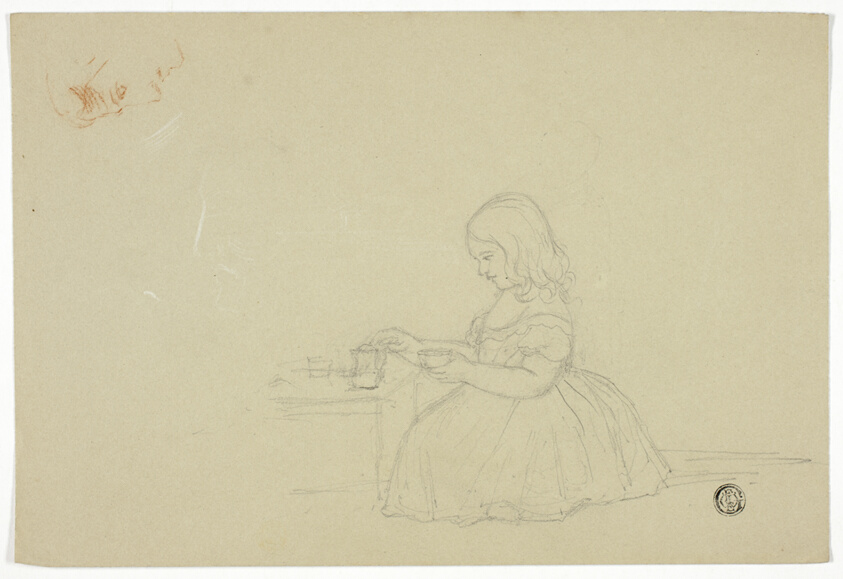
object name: Drawing and Watercolor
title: Young Girl Pouring Tea and Profile Sketch (recto), and Sketch of Italian City Street (verso)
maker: Elizabeth Murray (English, c. 1815-1882)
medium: Graphite and red chalk with traces of white chalk (recto), and graphite (verso), on gray wove paper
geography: England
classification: graphite; drawings (visual works); prints and drawing